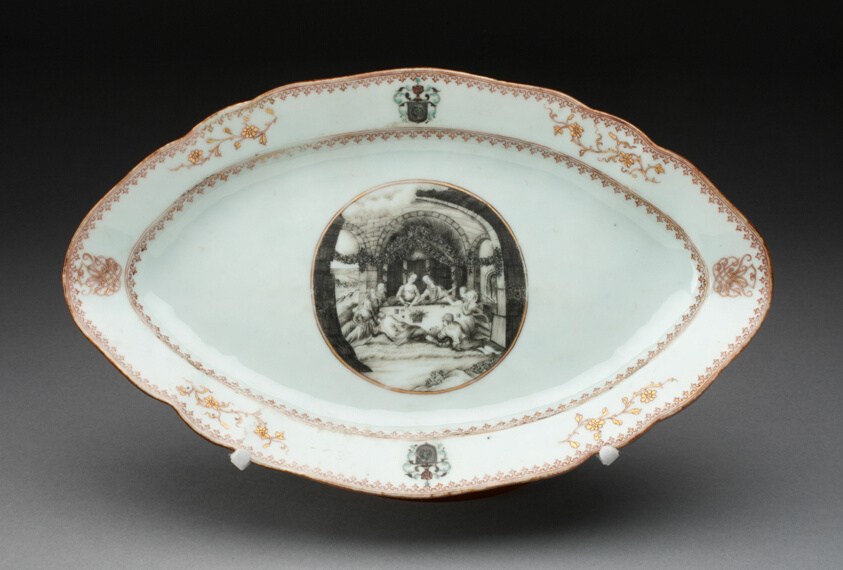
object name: Ceramics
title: Platter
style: chinese export, Chinese (culture or style), East Asian, asian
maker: China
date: 1750/60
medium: Hard-paste porcelain, polychrome enamels and gilding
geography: Jingdezhen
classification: vessel for serving food; dish (vessel); chinese export porcelain; porcelain; european decorative arts; ceramics